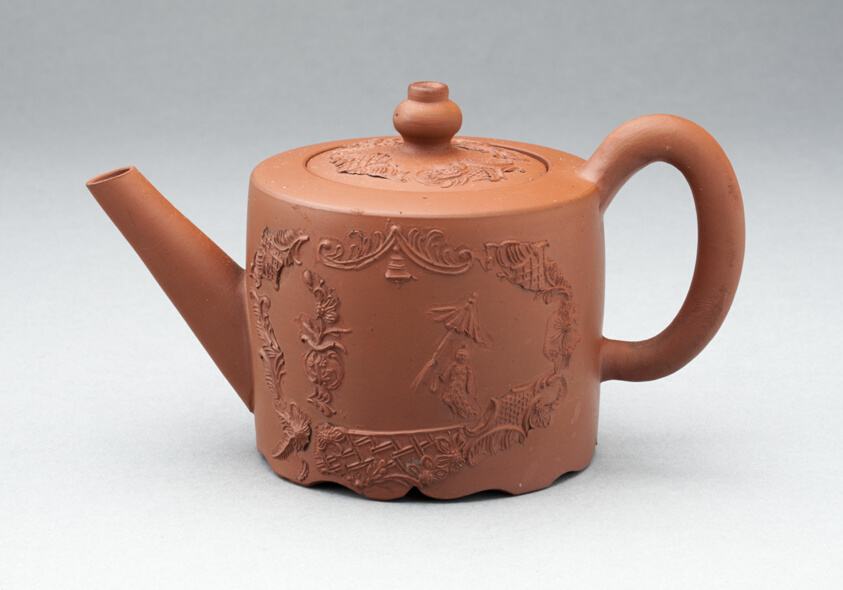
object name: Ceramics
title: Teapot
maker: England, Staffordshire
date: c. 1760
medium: Earthenware (redware)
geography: Staffordshire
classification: teapot; earthenware; ceramics; redware; european decorative arts